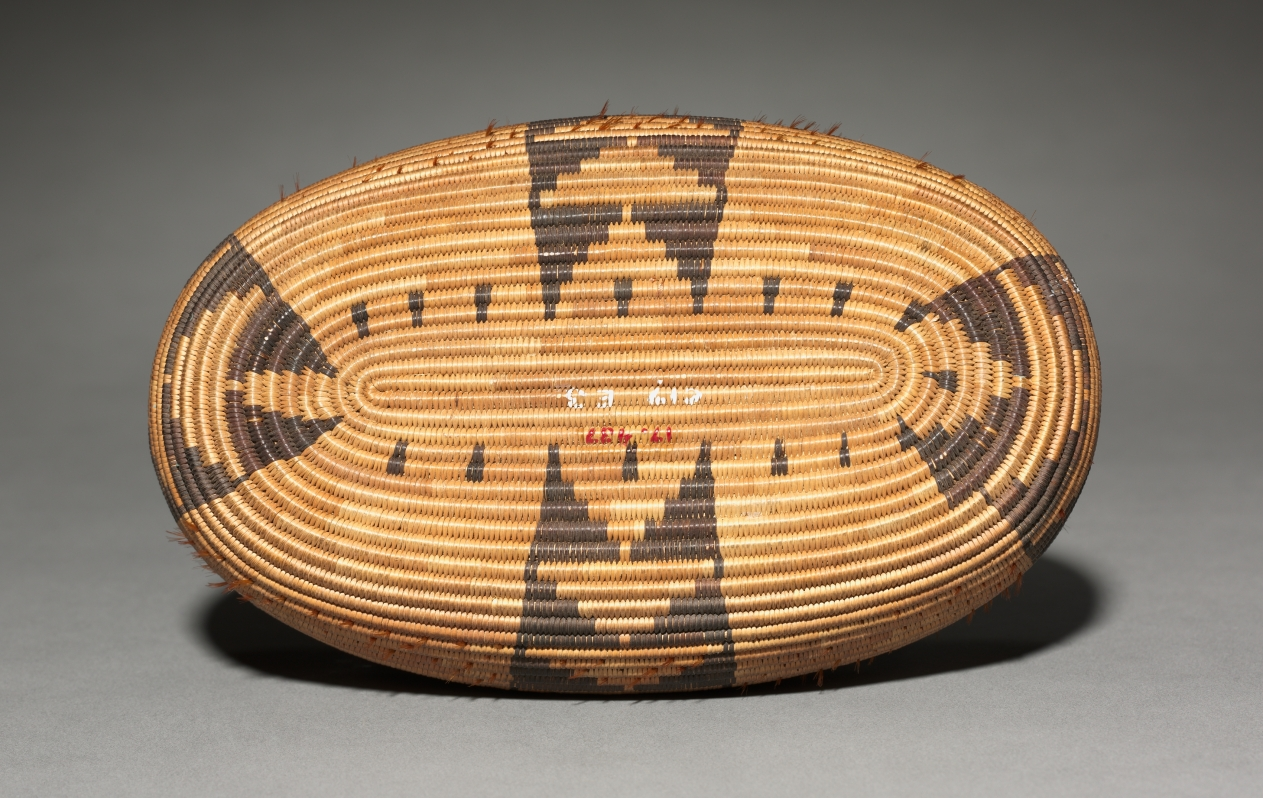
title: Gift Bowl, Canoe- Shaped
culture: California, Pomo, late 19th- early 20th century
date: 1890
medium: Willow, Bulrush, Sedge, with feather and acorn woodpecker; coiled (3 rods)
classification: Basketry